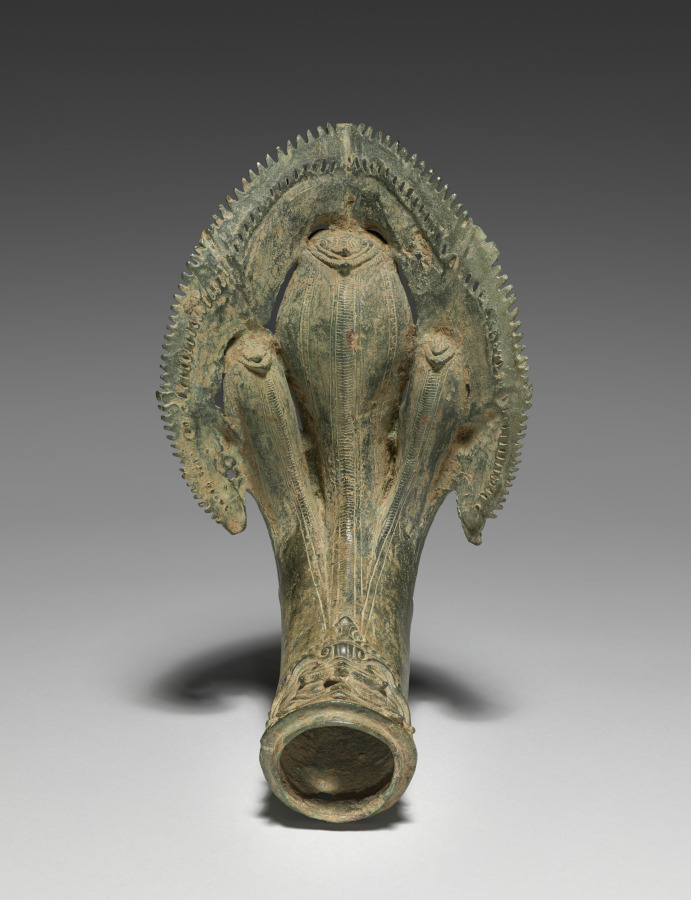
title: Naga Finial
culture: Cambodia, Angkor Wat period, 1100s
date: 1100s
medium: bronze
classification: Metalwork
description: When members of the royal family or priesthood traveled in a public festival procession or to a temple to make offerings or participate in a ceremony, they would be carried in a palanquin, or a covered litter. Portable objects of veneration, such as bronze images or a sacred fire, were also carried on palanquins. The palanquins had wooden poles, hanging seats or raised platforms, and bronze fittings cast in intricate forms and gilt, lending the palanquins a sumptuous quality. The royal palanquins were typically fitted with multiheaded, serpent-shaped finials at the ends of the poles and corners of the elevated platforms. Naga means serpent in Sanskrit, a language from India selectively appropriated by the Khmer in Cambodia. In their own indigenous mythology, the Khmer people trace their descent from a naga princess and a prince from the island of Java who journeyed to Cambodia. The naga remains a potent emblem for the Khmer nation to this day; it is ubiquitous on Cambodian monuments.